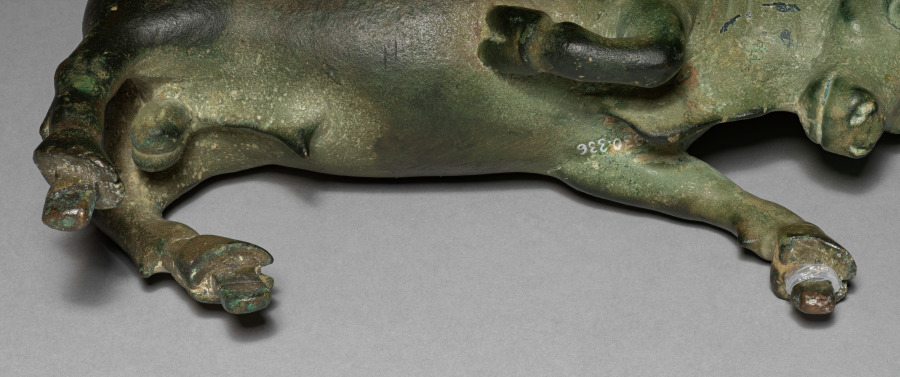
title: Pawing Bull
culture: South Italy, Lucania, Greek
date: 500–475 BCE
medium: bronze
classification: Sculpture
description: With its head slightly lowered and right foreleg raised in a pawing motion, this robust bull seems poised for action. The pose closely resembles that of bulls on coins minted at Thurii, a Greek colony in South Italy, but the statuette seems earlier in date and could have other associations. Perhaps the bull once carried the princess Europa, for example, or battled a lion or a hero. Alternatively, it may have stood alone as a small-scale offering, representing the actual bulls sometimes sacrificed to deities.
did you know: This solid-cast bronze bull is nearly intact, missing only its tail.